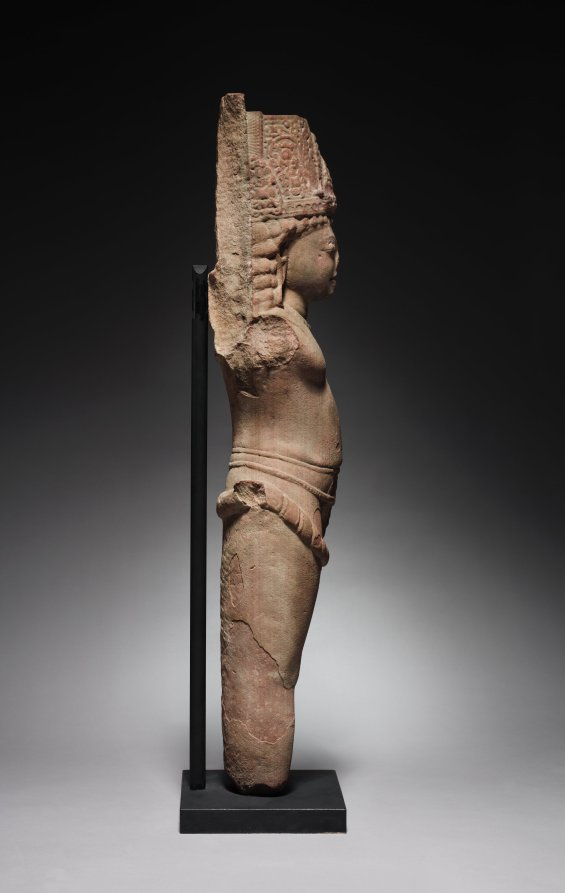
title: Standing Vishnu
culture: Northern India, Mathura, late Gupta Period (320-647)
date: late 500s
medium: red sandstone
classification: Sculpture